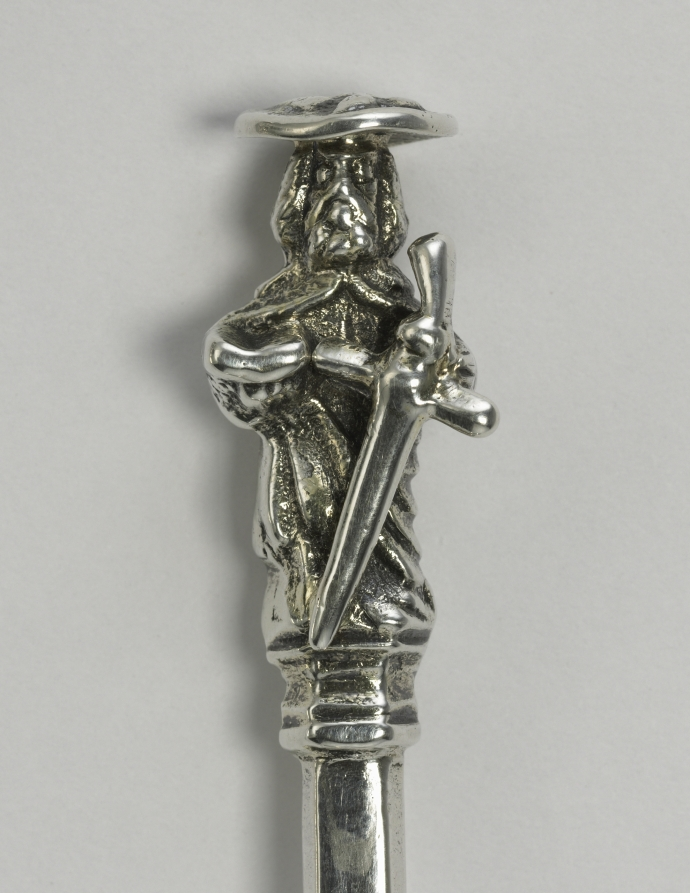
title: Saint Paul Spoon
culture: England, London, 17th century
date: 1622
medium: silver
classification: Silver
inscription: pricked on back of bowl: "R H."